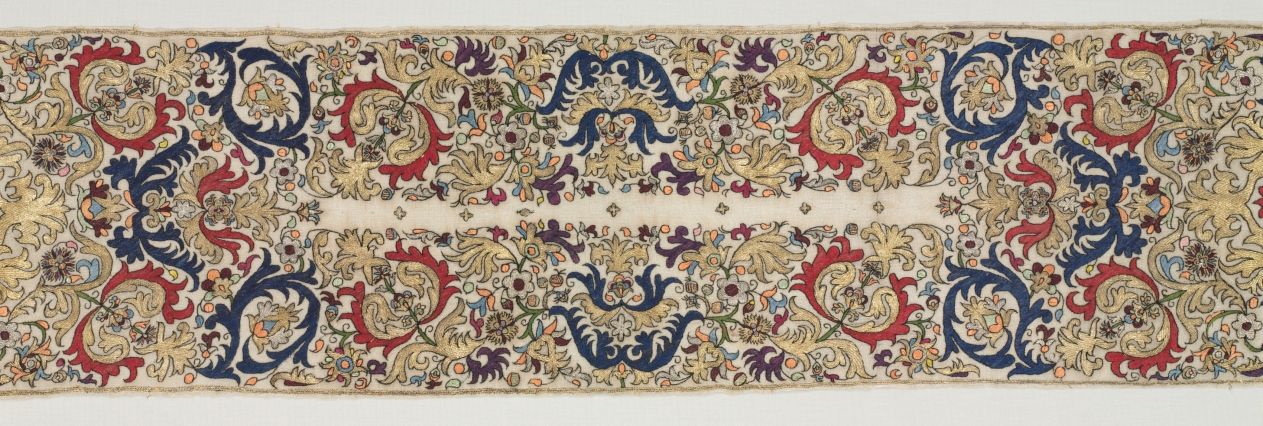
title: Kerchief (tensifa)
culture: Africa, North Africa, Algeria, Algerian embroiderer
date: 1700–1899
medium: Linen, silk, gold, silver, dye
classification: Embroidery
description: This beautiful kerchief, worn wrapped around the head, was part of elegant bathing equipment that well-to-do women wore while relaxing in a hammam after bathing. The floral and foliate embroidery reflect a fashion that lasted for more than a century. This example is dominated by lavish, radiating gold and silver thread.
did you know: Tiny traces of graphite on this textile show us how the artist carefully outlined the design to be embroidered.